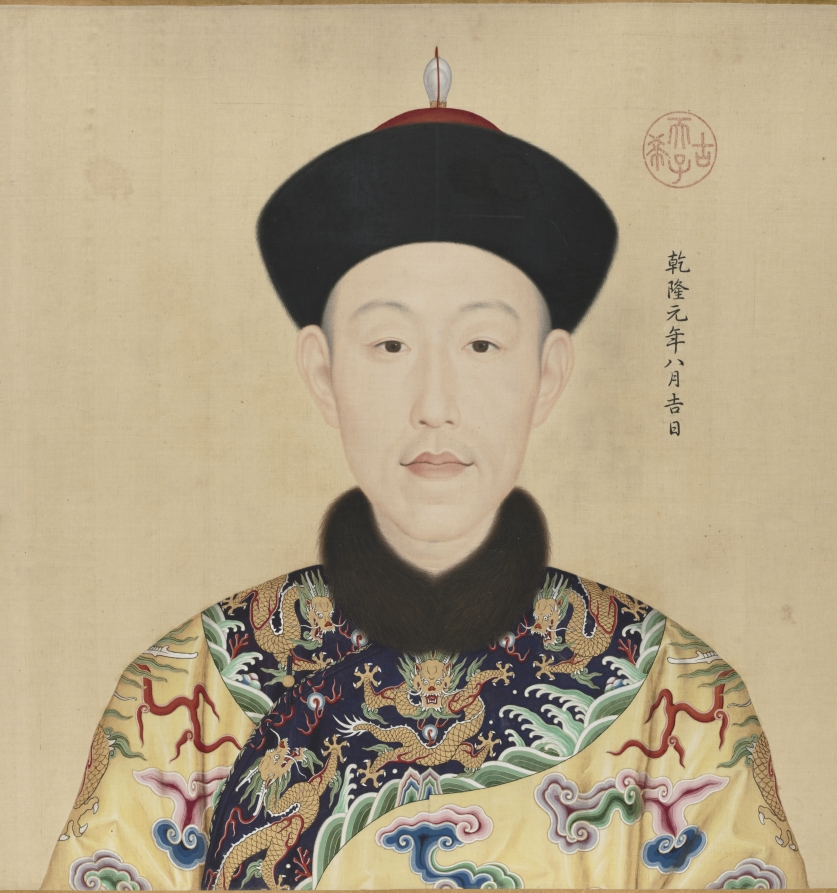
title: Portraits of the Qianlong Emperor and His Twelve Consorts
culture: China, Qing dynasty (1644–1911), Qianlong reign (1736–95)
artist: Giuseppe Castiglione (Italian, 1688–1766)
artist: and others (Chinese)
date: 1736–70s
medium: Handscroll; ink and color on silk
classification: Painting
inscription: 9 seals of the Qianlong emperor (r. 1736–95).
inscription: The eighth month, first year of Qianlong [1736] 乾隆元年八月吉日. The Empress (Xiaoxian) 皇后 (1712–1748), The Guifei (Huixian) 貴妃 (?-–1745), Chunfei 純妃 (1713–1760), Jiafei 嘉妃 (?–1755), Lingfei 令妃 (1727–1775), Shufei 舒妃 (1728–1777), Qingbin 慶嬪 (1724–1774), Yingbin 穎嬪 (1731–1800), Xinbin 忻嬪 (?–1764), Dunfei 惇妃 (1746–1806), Xunfei 順妃 (1749–1788), Shunbin 循嬪 (?–1797).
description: This portrait shows the Qianlong emperor at 26, in the first year of his reign. His likeness is followed by portraits of the empress and eleven consorts. Their portraits document the appearances of the court women around the time when they received their respective imperial titles, which occurred at different stages of the emperor's life. The first three portraits were done by the Jesuit (Roman Catholic) missionary artist Giuseppe Castiglione, whereas the later ones were by Chinese court painters. Formal portraiture contributed to the affirmation of status and construction of role and identity. This scroll served as both familial documentation and a "mind picture" of the Qianlong emperor, suggesting that his constructed image of emperorship was inseparable from concepts of self and family. It was stored in a carved red lacquer box bearing the original painting title Mind Picture of a Well-Governed and Tranquil Reign (see CMA 1969.32).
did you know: Lingfei 令妃 (1727–1775), the first consort depicted in the maroon or “incense-colored" 香色 robe, was the mother of six of Qianlong’s children, including the future Emperor Jiaqing.